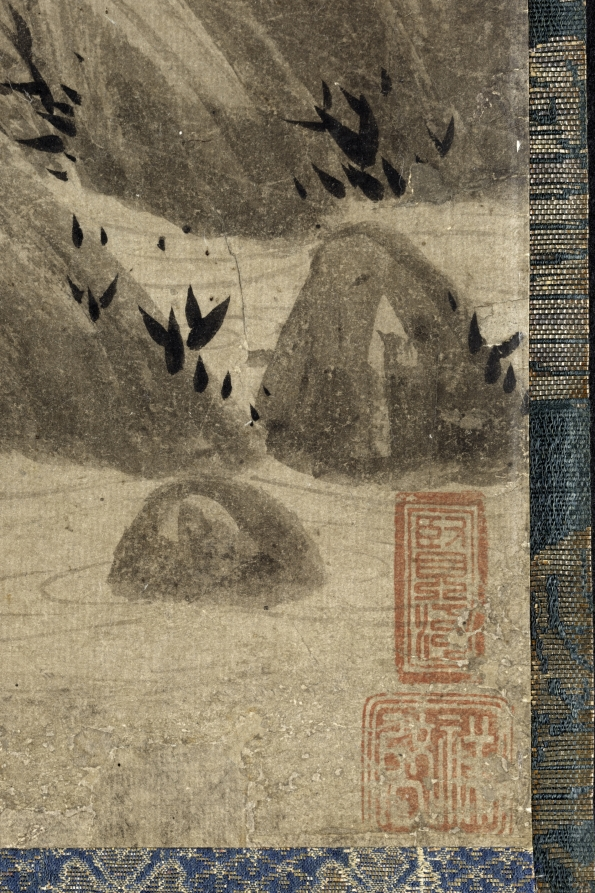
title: Kingfisher Perched above a Stream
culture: Japan, Muromachi period (1392–1573)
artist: Kenkō Shōkei (Japanese, active 1478–1506)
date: late 1400s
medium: hanging scroll; ink on paper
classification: Painting